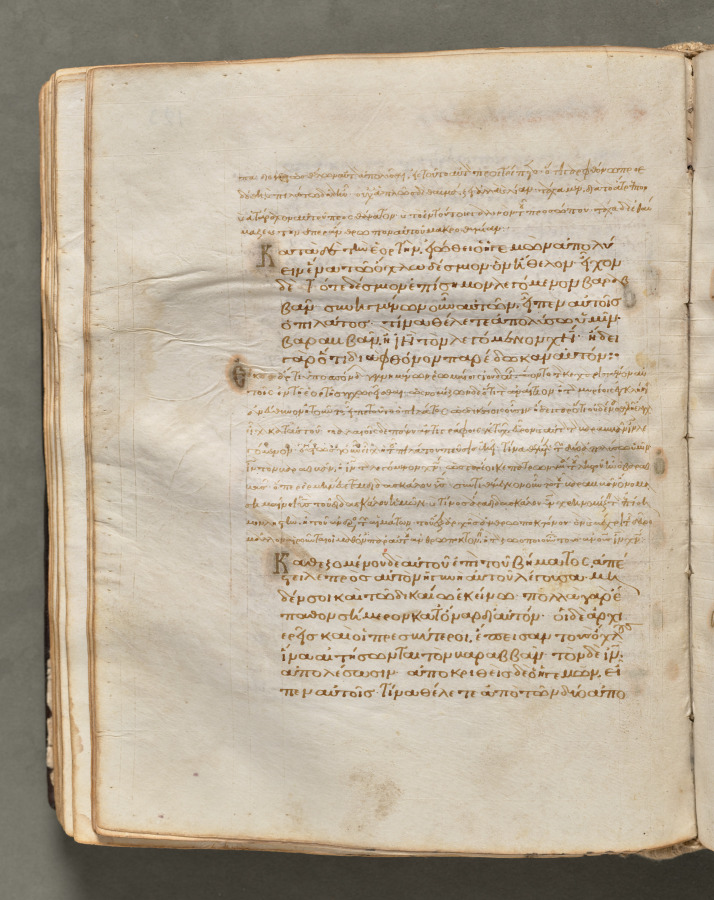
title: Text, folio 123 (verso), from a Gospel Book with Commentaries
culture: Byzantium, Constantinople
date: c. 1000–1100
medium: ink, tempera, and gold on vellum; leather binding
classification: Bound Volume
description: Each of the four gospels in this book opens on a page with brilliantly illuminated borders depicting the author of the text as well as birds-principally peacocks, symbols of the immortality of the soul-and fountains, representing the fountain of life and the salvation of the soul. This volume consists of 428 leaves with texts in Greek. Its level of sophistication suggests that it was probably written and decorated in a monastery in Constantinople.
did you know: Gospel Books were carried in procession through Byzantine churches.